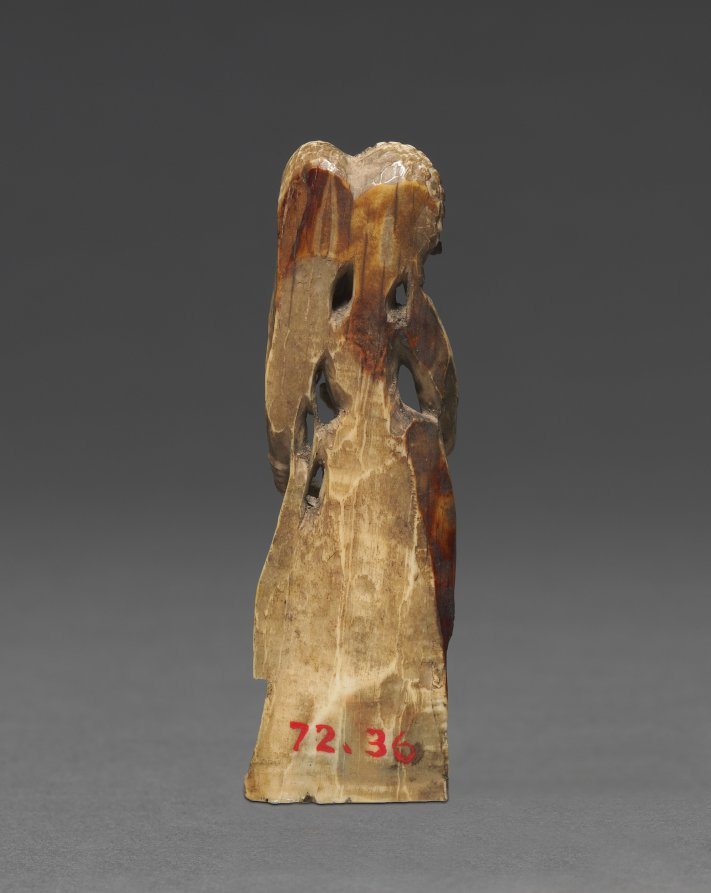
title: Female Attendant Bearing Fly-Whisk (Chauri)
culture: India, Kashmir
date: 700s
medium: ivory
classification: Ivory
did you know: The chaurī, or flywhisk, is a frequent attribute of attendants.